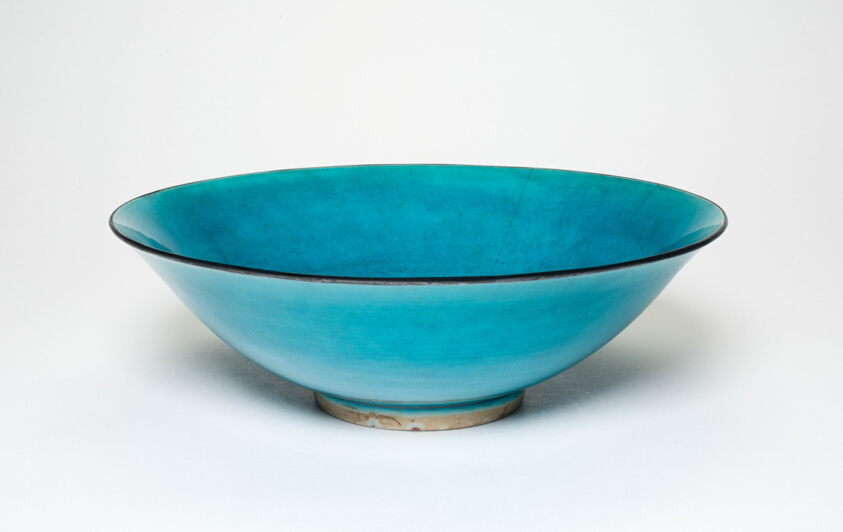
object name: Vessel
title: Bowl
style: Chinese (culture or style)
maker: China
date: Ming dynasty (1368–1644)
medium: Porcelain with turquoise glaze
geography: China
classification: bowl; porcelain; dish (vessel); asian art; ceramics; vessel